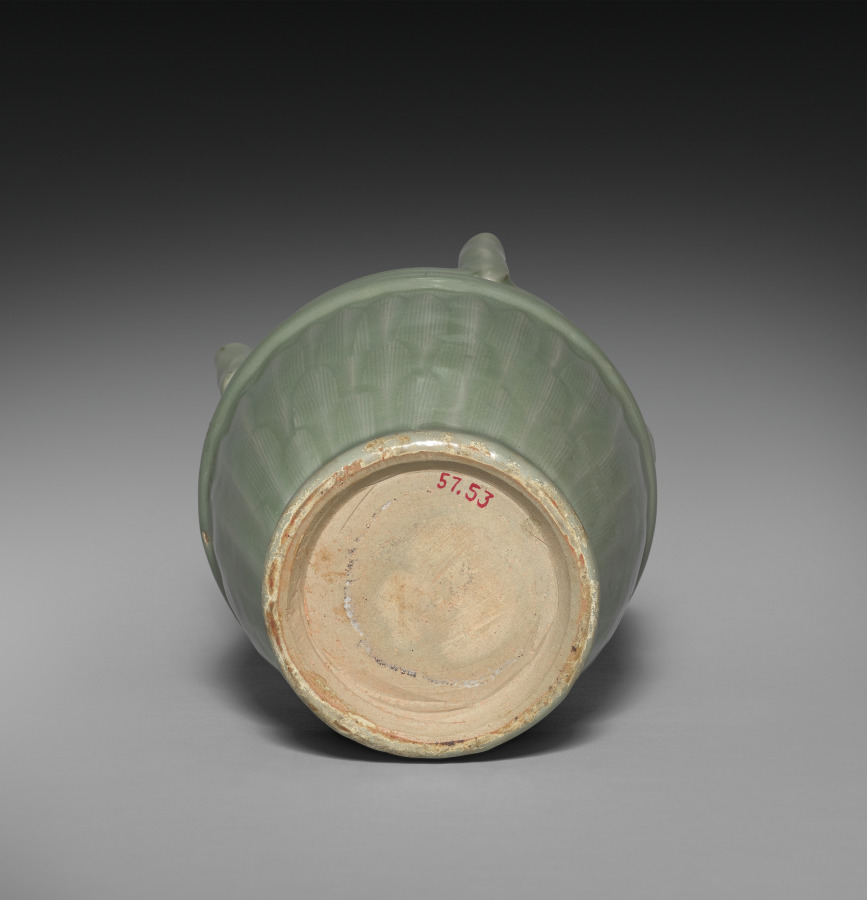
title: Five-Spouted Vase with Cover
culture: China, Zhejiang province, Longquan region, Northern Song dynasty (960-1127)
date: 1000s-1100s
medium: green-glazed porcelaneous stoneware, Longquan ware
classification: Ceramic